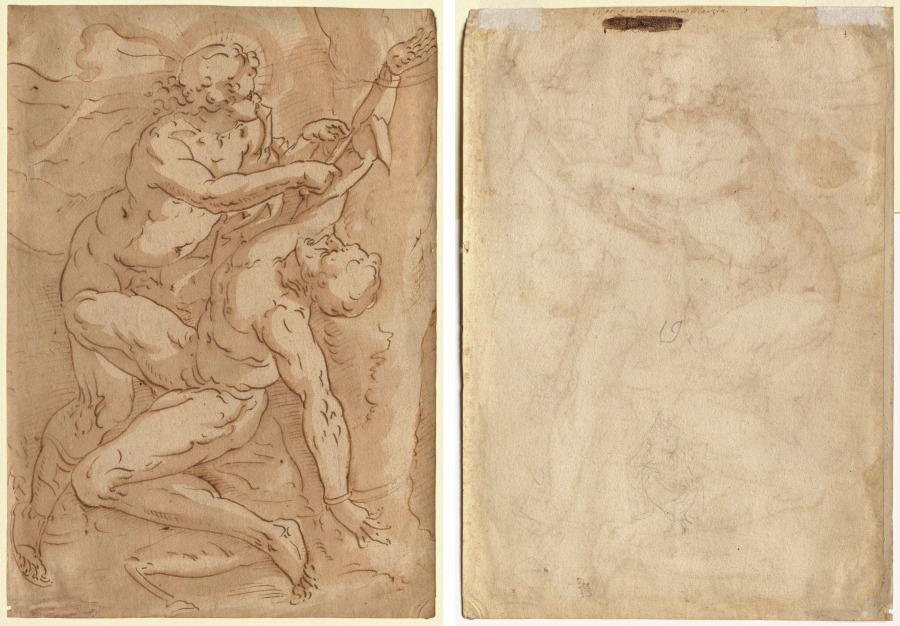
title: Apollo Flaying Marsyas (recto); Two Sketches of a Mother and Child (verso)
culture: Germany (or Netherlands), 16th century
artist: Anonymous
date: 1500s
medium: pen and brown ink and brown wash over black chalk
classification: Drawing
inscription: VERSO, upper center, in brown ink: Apollo chi scortica Marzia ; center, in graphite: 19